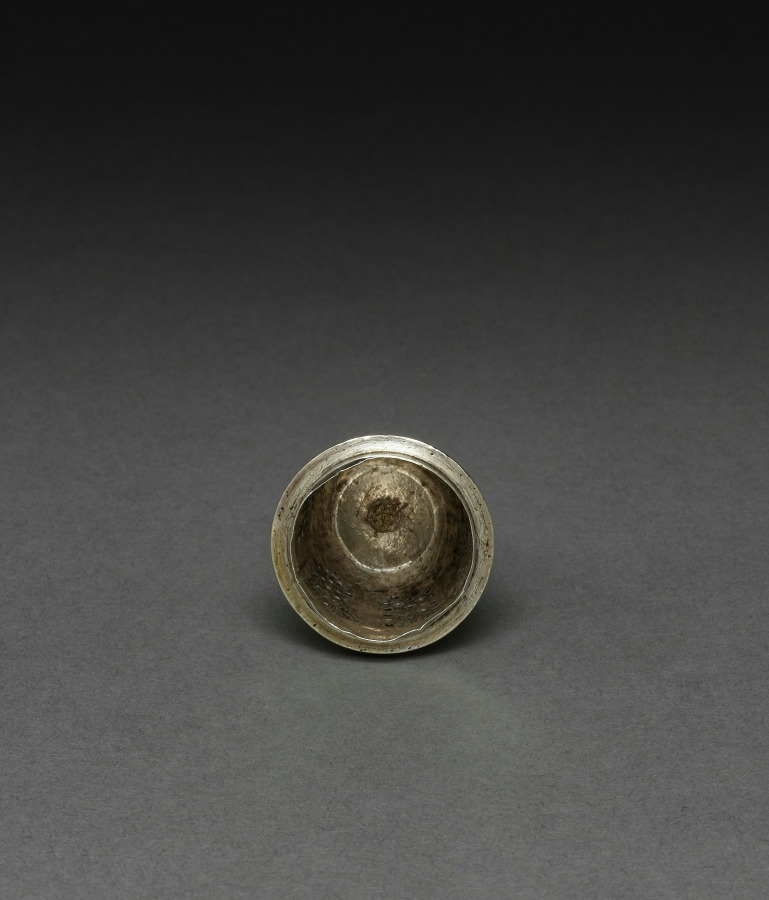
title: Caster (lid)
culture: America, Massachusetts, Salem, 18th century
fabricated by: John Andrew (American, 1747–1791)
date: c. 1770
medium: silver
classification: Silver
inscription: Engraved underside of base: "C * S"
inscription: Stamped on side of vessel: "Andrew"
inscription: Scratched underside of base: "3-10"